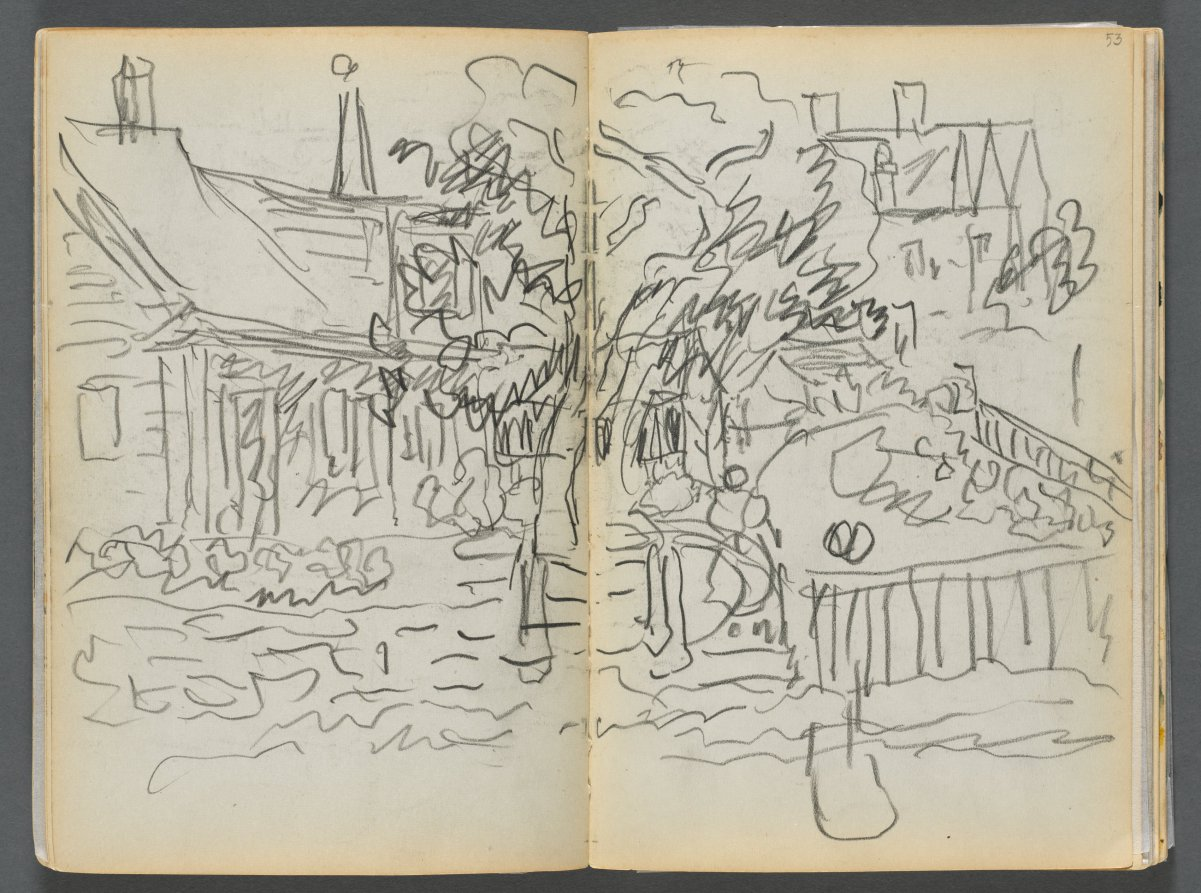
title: Sketchbook- The Granite Shore Hotel, Rockport, page 052 & 53: Houses and Gardens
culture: America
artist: Maurice Prendergast (American, born Newfoundland [now Canada], 1858–1924)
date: 1905–10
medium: graphite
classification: Bound Volume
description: This sketchbook contains 72 pages of pencil drawings and 9 watercolors of Cape Ann. On the inside of the cover Prendergast wrote the address of the Granite Shore Hotel in Rockport, Massachusetts.